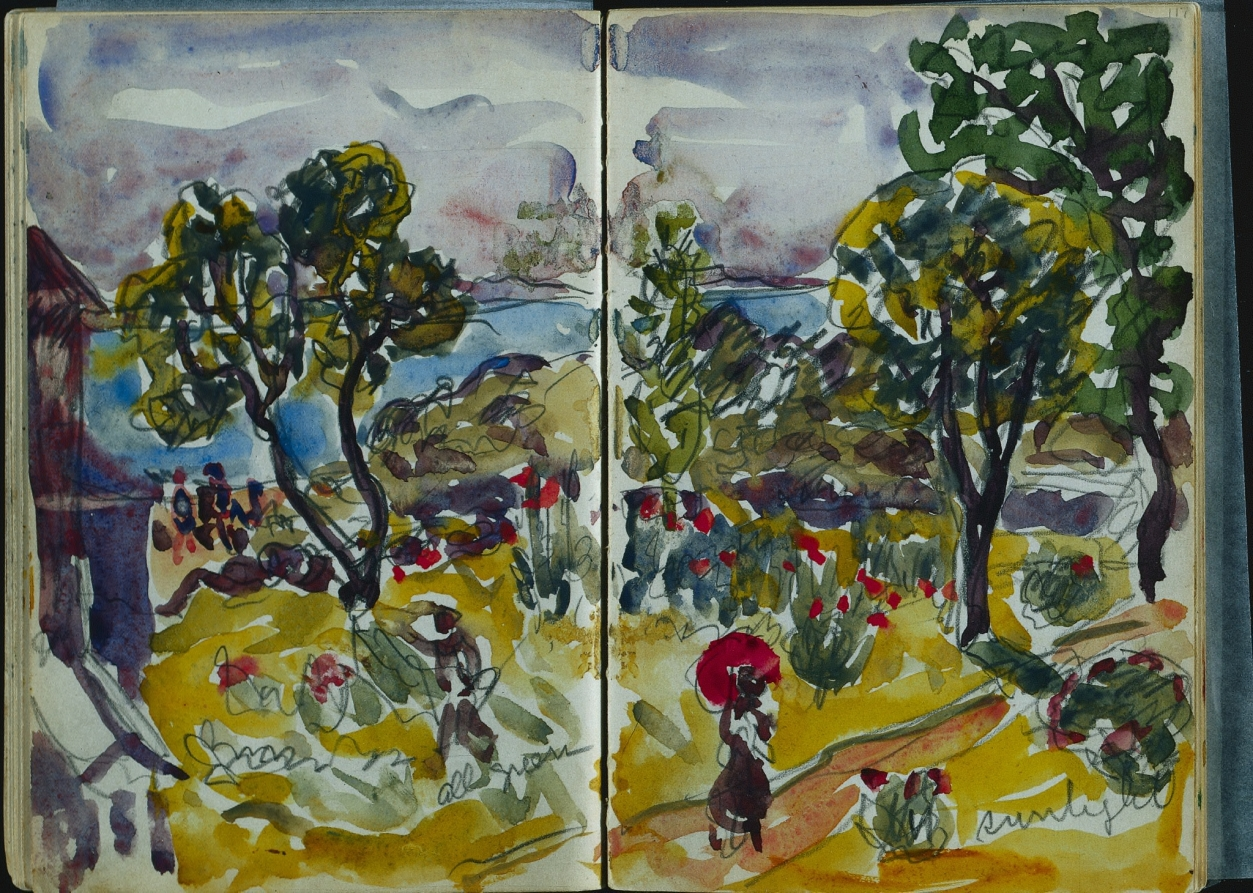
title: Sketchbook- The Granite Shore Hotel, Rockport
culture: America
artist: Maurice Prendergast (American, born Newfoundland [now Canada], 1858–1924)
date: c. 1916/19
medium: pencil and watercolor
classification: Bound Volume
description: This sketchbook contains 72 pages of pencil drawings and 9 watercolors of Cape Ann. On the inside of the cover Prendergast wrote the address of the Granite Shore Hotel in Rockport, Massachusetts.